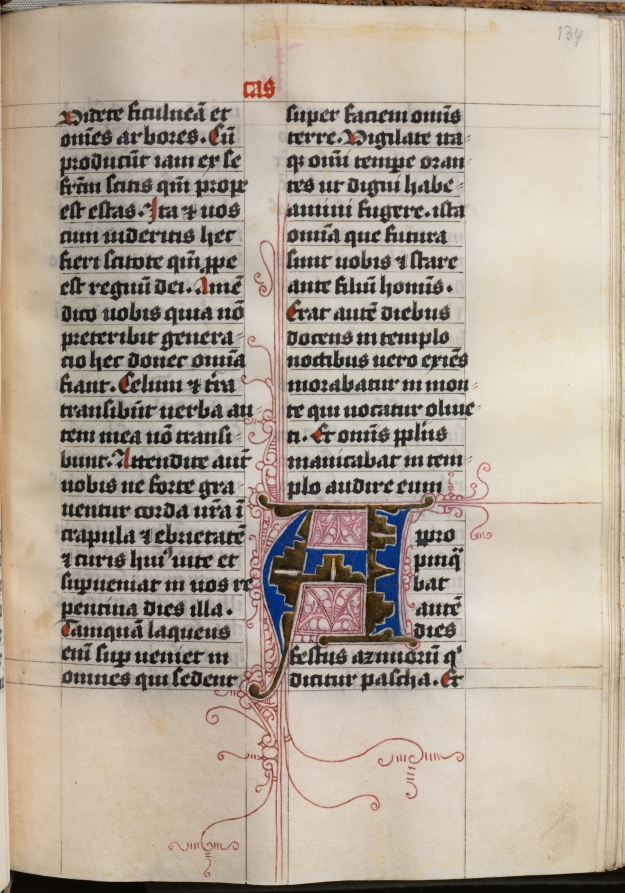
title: Gospel Book with Evangelist Portraits: Decorated Initial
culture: Germany, Middle Rhine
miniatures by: Master of the House-Book (German, c. 1470–1500)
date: c. 1480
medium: ink, tempera, and gold on vellum; original blind stamped leather binding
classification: Bound Volume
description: The four gospels are preceded by a full-page portrait miniature of the appropriate evangelist. Per tradition, they are represented as contemporary scribes surrounded by all the tools of their trade— ink pots, quill pens, and penknives. The anonymous illuminator of these miniatures, called the Hausbuch Master, is known primarily for an album of lively drawings as well as some 90 copper engravings now in Amsterdam. He was also apparently a panel painter of some distinction. The skillful pen work, tracery, and vine scrolls, as well as the large initials, are the work of other artists.The binding is original.